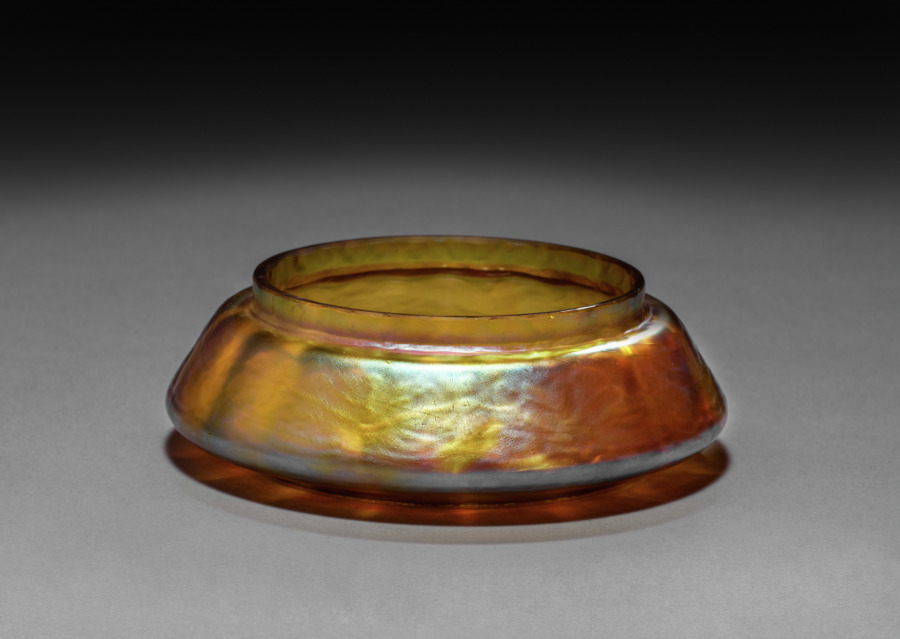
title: Box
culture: America, New York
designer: Louis Comfort Tiffany (American, 1848–1933)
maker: Tiffany Glass & Decorating Company (America, New York, 1892–1902)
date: 1898–1901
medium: Favrile glass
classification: Glass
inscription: on bottom: 129 Louis C. Tiffany Favrile.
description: By 1900 Tiffany had expanded his empire by increasing the firm’s production of “fancy goods,” including inkstands, candlesticks, clocks, small boxes, desk sets, tea screens, and other functional objects. Along with the array of artistic glass designs from his factory in Corona, Queens, works in ceramic, bronze, other metals, and even jewelry abounded. These smaller, more affordable luxury items were designed with as much thought to artistry as the great stained glass windows and lamps through which the firm enjoyed unrivaled success.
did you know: This fanciful dressing table accessory likely contained dusting powder and a feather puff.